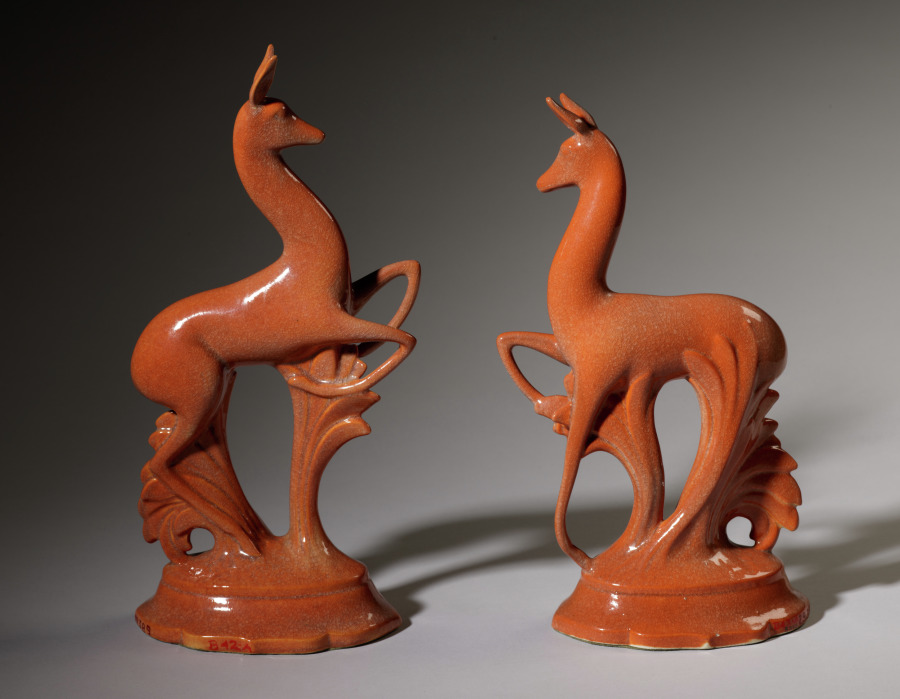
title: Two Fawns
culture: America, Ohio, Cleveland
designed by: Waylande Gregory (American, 1905–1971)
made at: Cowan Pottery Studio (America, Ohio, Rocky River, 1920–1931)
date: 1929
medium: earthenware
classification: Ceramic